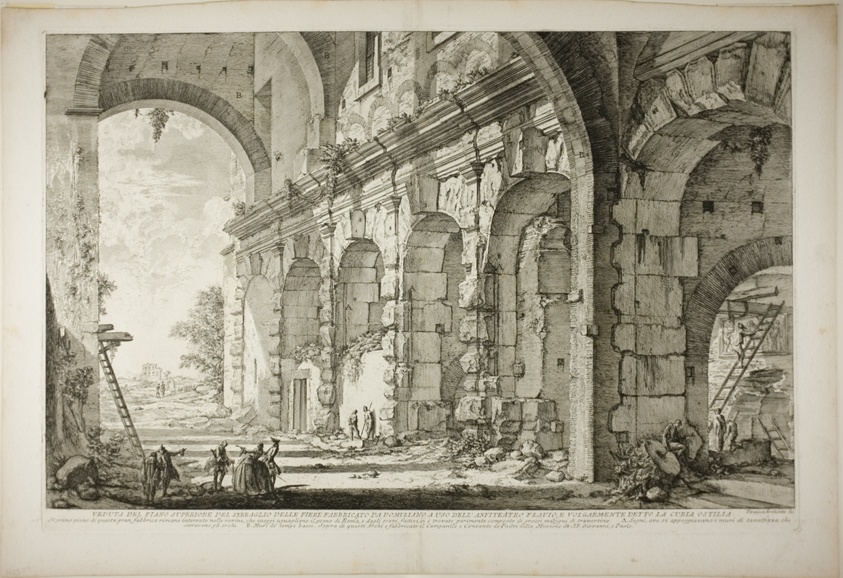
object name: Print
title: View of the upper storey of the Cages for Wild Animals built by the Emperor Domitian, associated with the Flavian Amphitheater and commonly called the Curia Hostilia, from Views of Rome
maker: Giovanni Battista Piranesi (Italian, 1720-1778)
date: 1750/59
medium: Etching on heavy ivory laid paper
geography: Italy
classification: etching; print; prints and drawing